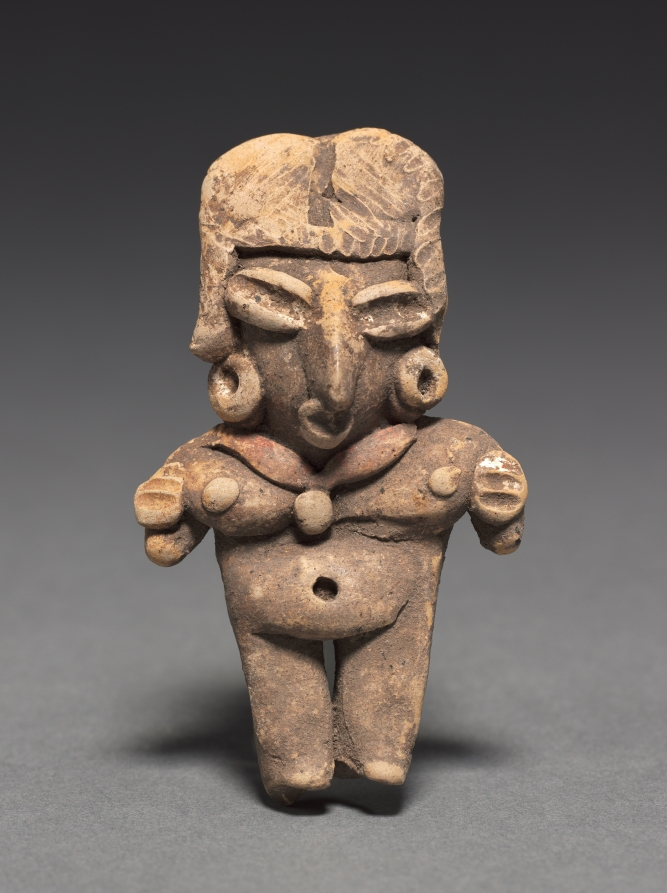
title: Female Figurine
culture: Mesoamerica, Mexico, Guanajuato, Chupícuaro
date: 400–100 BCE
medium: pottery with white and red pigment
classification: Sculpture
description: The Chupícuaro culture, located north of Mexico City in the state of Guanajuato, created a distinctive ceramic tradition including small clay figurines. This example is said to belong to a group of ten figurines from the same burial or cache (1990.145–154). The group includes both males and females that can be sorted into couples based on size.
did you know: Groups of figurines were sometimes arranged in scenes and likely used in household rituals.